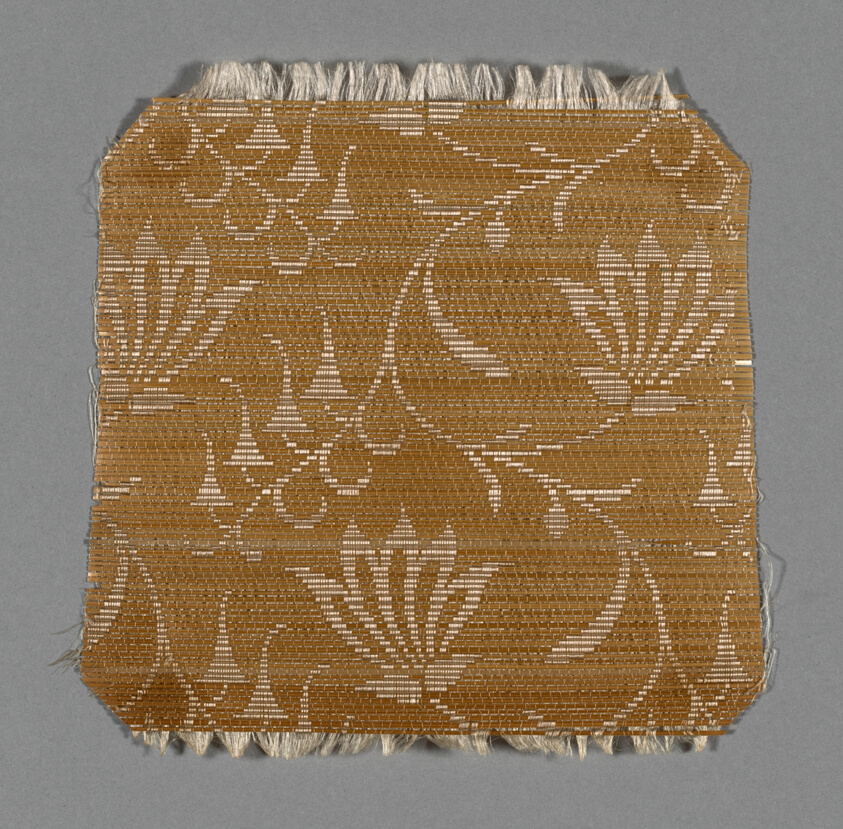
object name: Textile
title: Sample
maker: France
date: 19th century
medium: Silk and straw, plain weave self-patterned by areas of twill interlacing over plain interlacing; woven on loom with Jacquard attachment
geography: France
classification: textile; weaving